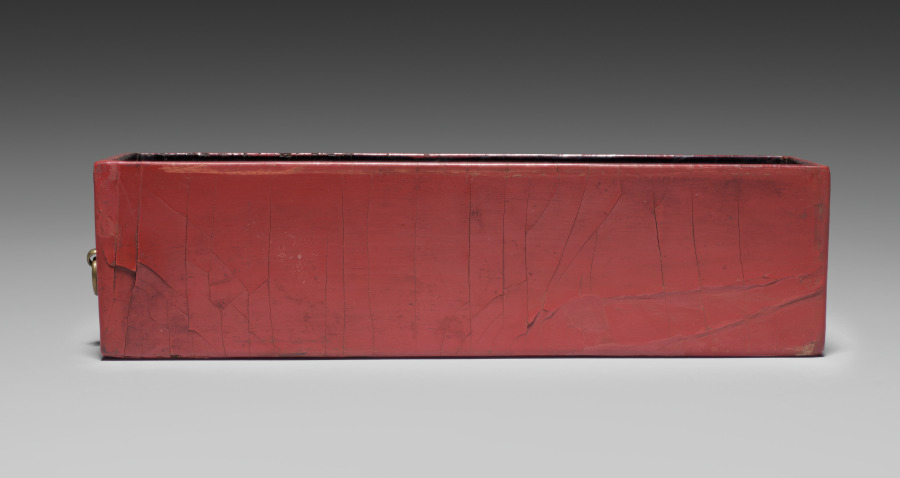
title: Drawer for a Tihong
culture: China, Ming dynasty (1368-1644), Wanli reign (1572-1620)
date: 1585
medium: carved cinnabar lacquer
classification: Lacquer